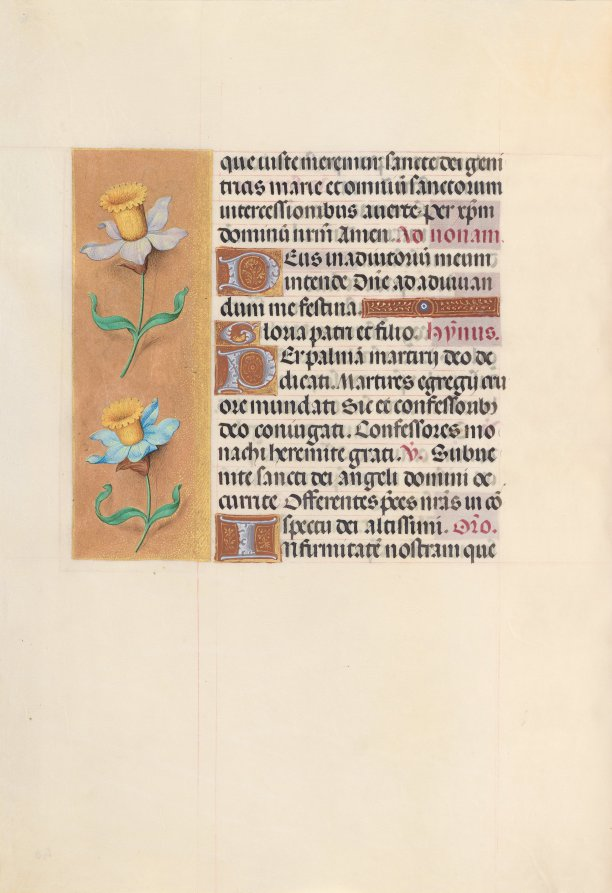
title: Hours of Queen Isabella the Catholic, Queen of Spain: Fol. 40v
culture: Flanders, Ghent and Bruges, late 15th century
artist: Master of the First Prayerbook of Maximillian (Flemish, c. 1444–1519)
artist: and Associates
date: c. 1500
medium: ink, tempera, and gold on vellum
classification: Bound Volume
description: This manuscript was illuminated by a circle of at least five highly organized manuscript painters active in the Flemish cities of Ghent and Bruges. The principal illuminator was Alexander Bening, who painted the majority of the book's miniatures. Manuscripts produced by this circle of artists are renowned for the decoration of their borders, which typically feature a rich variety of realistically-painted flowers, birds, and butterflies. This prayer book, called a book of hours, was intended not for a cleric, but for the private devotions of a lay person-in this case, Isabella the Catholic, Queen of Spain (1451-1504). Isabella's coat of arms embellishes the book's frontispiece. It is unlikely that the book was commissioned by the Queen herself; rather, she probably received it as a diplomatic gift from someone courting her patronage, perhaps Cardinal Francisco Jimenez de Cisneros. A Franciscan friar, Jimenez was dependent upon Isabella for his advancement, first to the post of Queen's confessor in 1492, and then to Archbishop of Toledo in 1495.